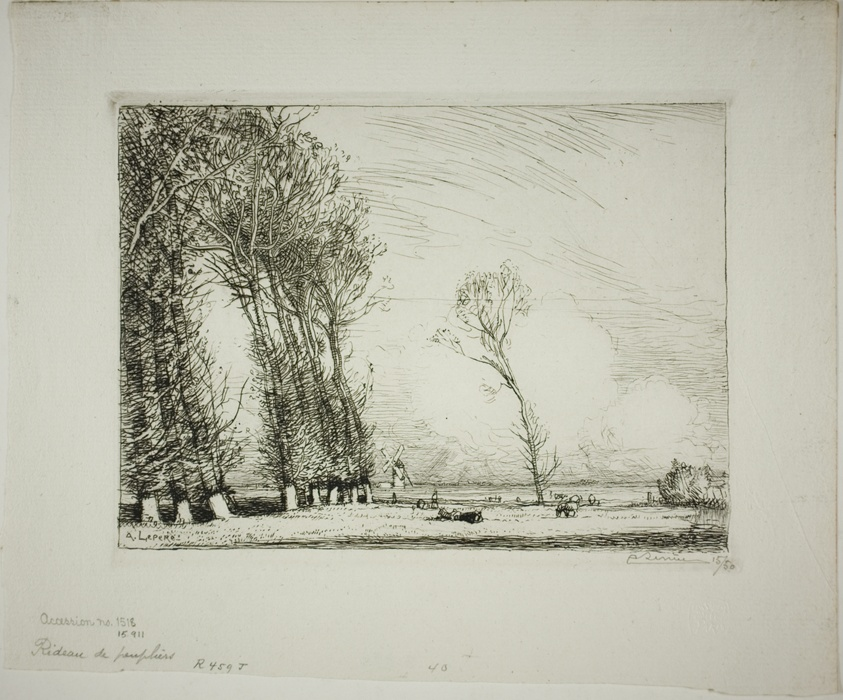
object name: Print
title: Screen of Poplars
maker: Louis Auguste Lepère (French, 1849-1918)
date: 1911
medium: Etching on cream laid paper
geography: France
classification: etching; print; prints and drawing